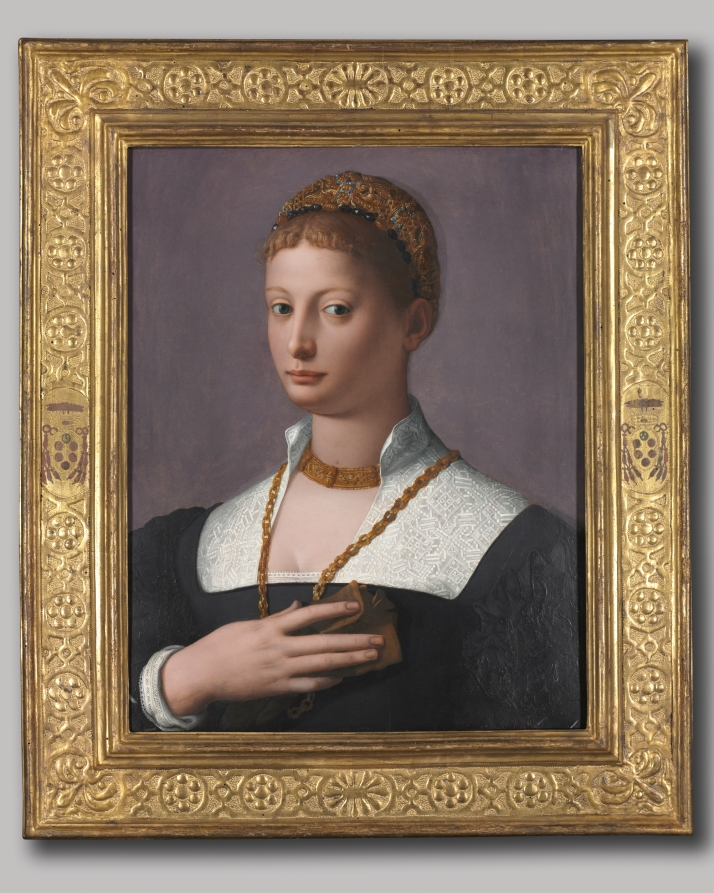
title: Portrait of a Woman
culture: Italy, Florence, 16th century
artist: Agnolo Bronzino (Italian, 1503–1572)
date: c. 1550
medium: oil on wood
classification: Painting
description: Bronzino was court painter to Cosimo I de’Medici, the Duke of Florence. Though the woman cannot be definitively identified, she was likely affiliated with the Medici court. As in most of the portraits in this gallery, Bronzino emphasizes wealth, status, and courtly refinement above personality or individualized expression. The plain background further accentuates the work’s monumentality and grandeur, despite its small scale. The hand placed against the chest with elegantly spread fingers extends back to an ancient Greek pose of modesty, here emphasizing the proper comportment of a woman of high status. The sitter wears a linen partlet (collar) delicately embroidered in matt stitch, part of which is, like her cuffs, trimmed in fine lace.